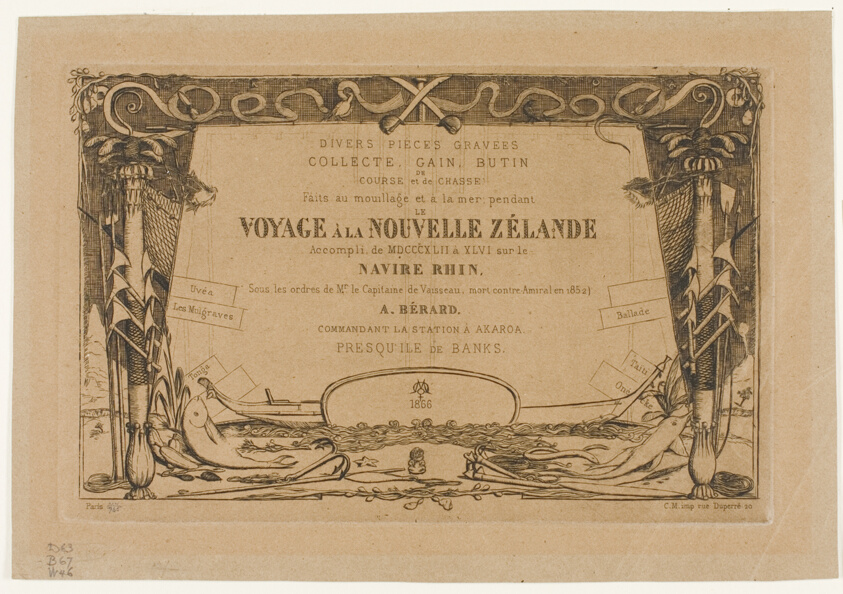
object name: Print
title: Cover for a Voyage to New Zealand (1842-46)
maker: Charles Meryon (French, 1821-1868)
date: 1866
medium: Etching on brown wove paper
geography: France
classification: etching; print; prints and drawing